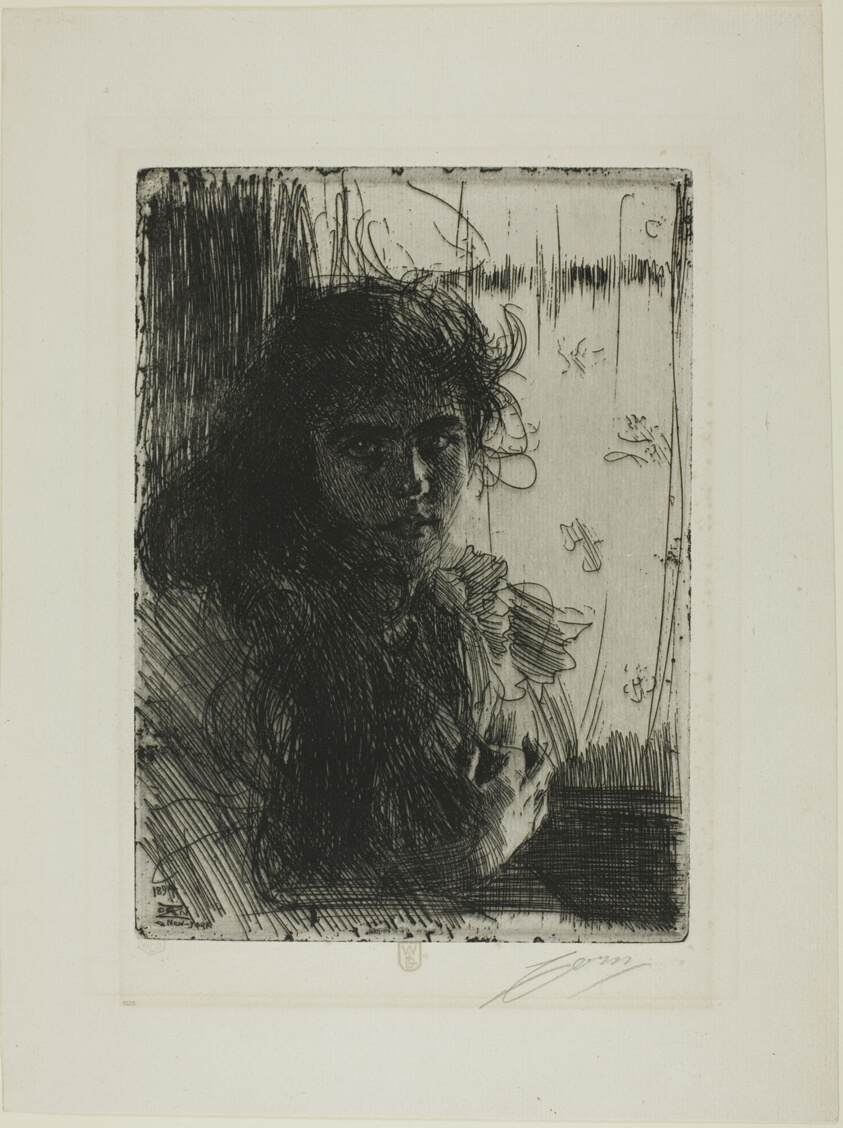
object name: Print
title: An Irish Girl or Annie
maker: Anders Zorn (Swedish, 1860-1920)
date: 1894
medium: Etching on ivory laid paper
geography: Sweden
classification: etching; print; prints and drawing